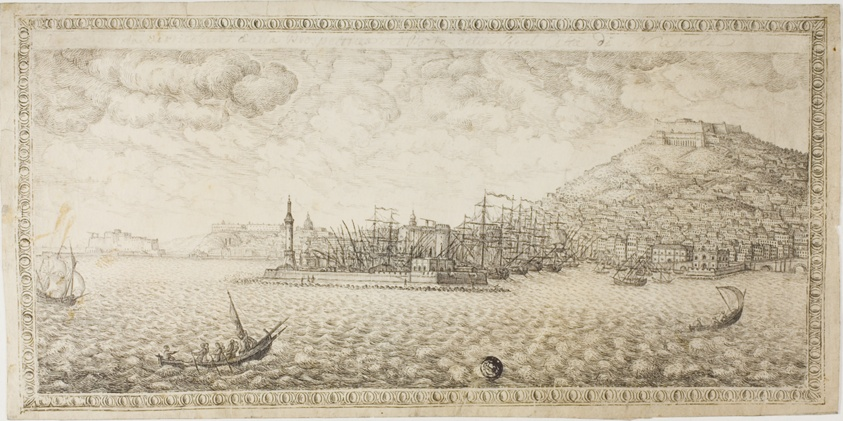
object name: Drawing and Watercolor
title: Harbor of Naples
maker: Unknown Artist; Possibly Italian. n.d.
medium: Pen and black ink on vellum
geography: Italy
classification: pen and ink drawings; drawings (visual works); prints and drawing